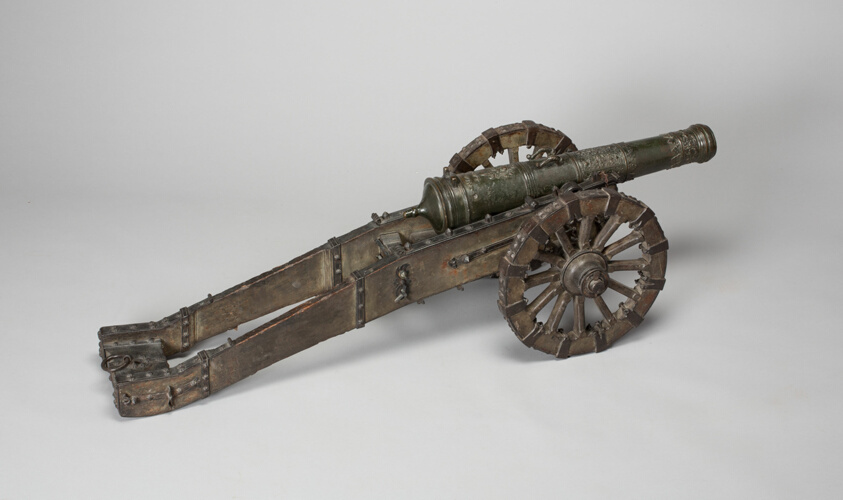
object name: Arms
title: Model Field Cannon with Carriage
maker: Dutch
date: c. 1600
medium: Bronze and wood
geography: Netherlands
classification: firearm-cannon; arms; arms and armor